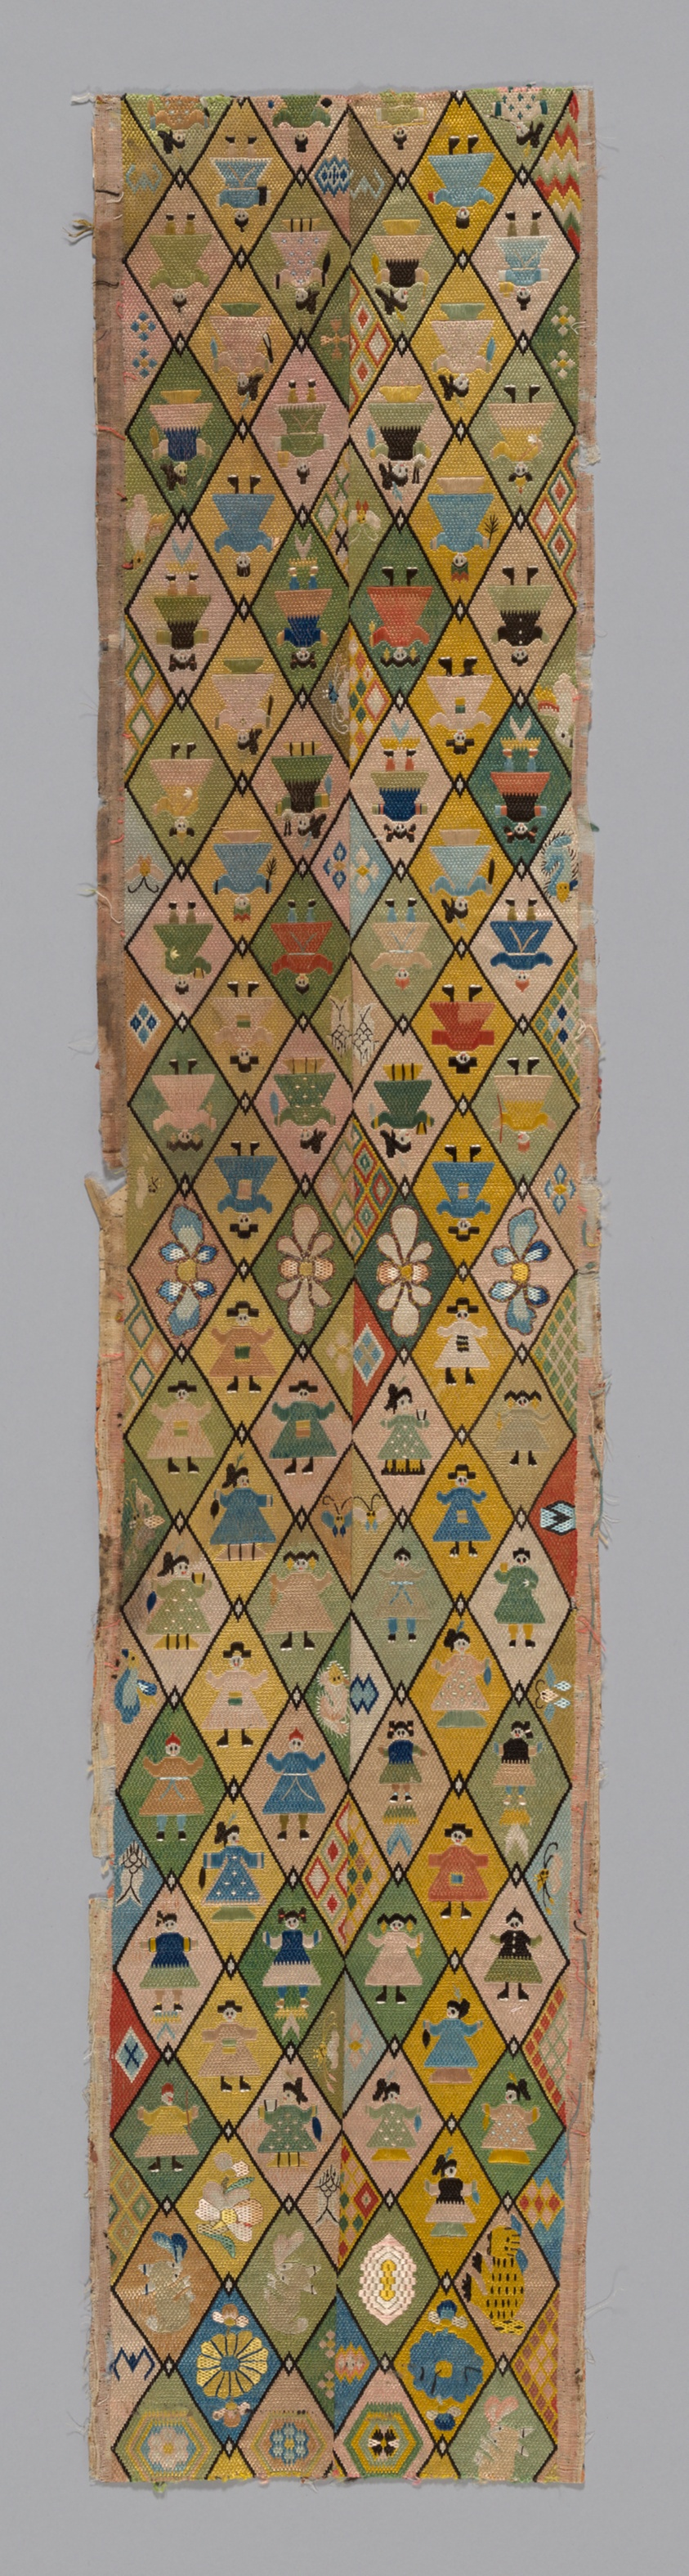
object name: Textile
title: Panel (For Sleeve Bands)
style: qing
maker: Han-Chinese (China)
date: Qing dynasty (1644–1911), 1875/1900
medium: Forty-four pairs and eight odd pieces of embroidered sleeve, ankle bands, etc. on gauze.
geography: China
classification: textile; weaving; needlework (visual works)